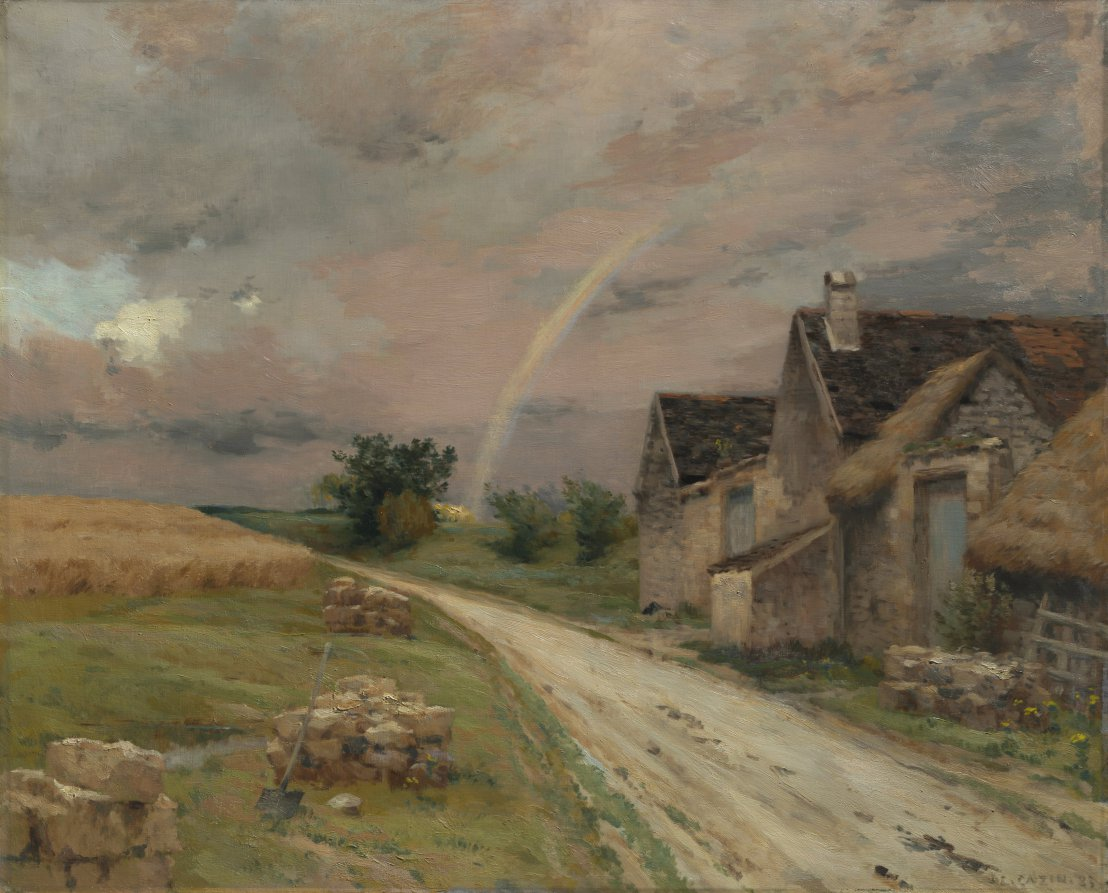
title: The Rainbow, Achères la Forêt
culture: France, 19th century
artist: Jean-Charles Cazin (French, 1841–1901)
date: 1883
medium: oil on fabric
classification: Painting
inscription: Signed lower right in brown paint: J. C. Cazin .83